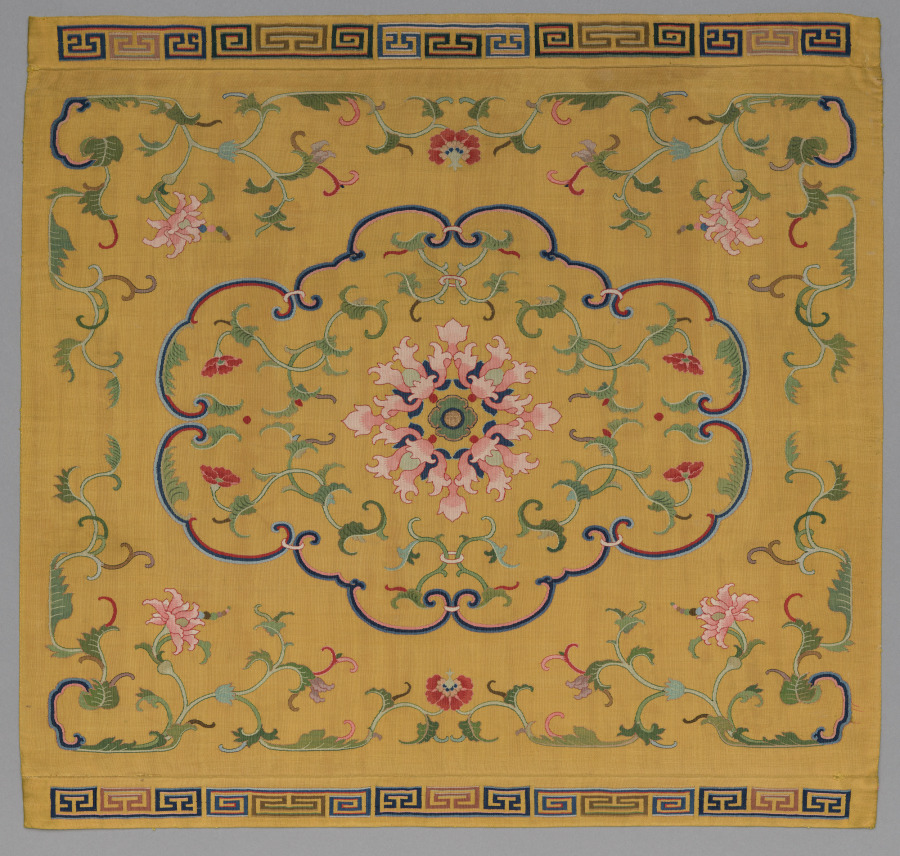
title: Cushion Cover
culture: China, Qing dynasty (1644-1911)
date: 1700s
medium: silk, metallic thread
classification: Textile